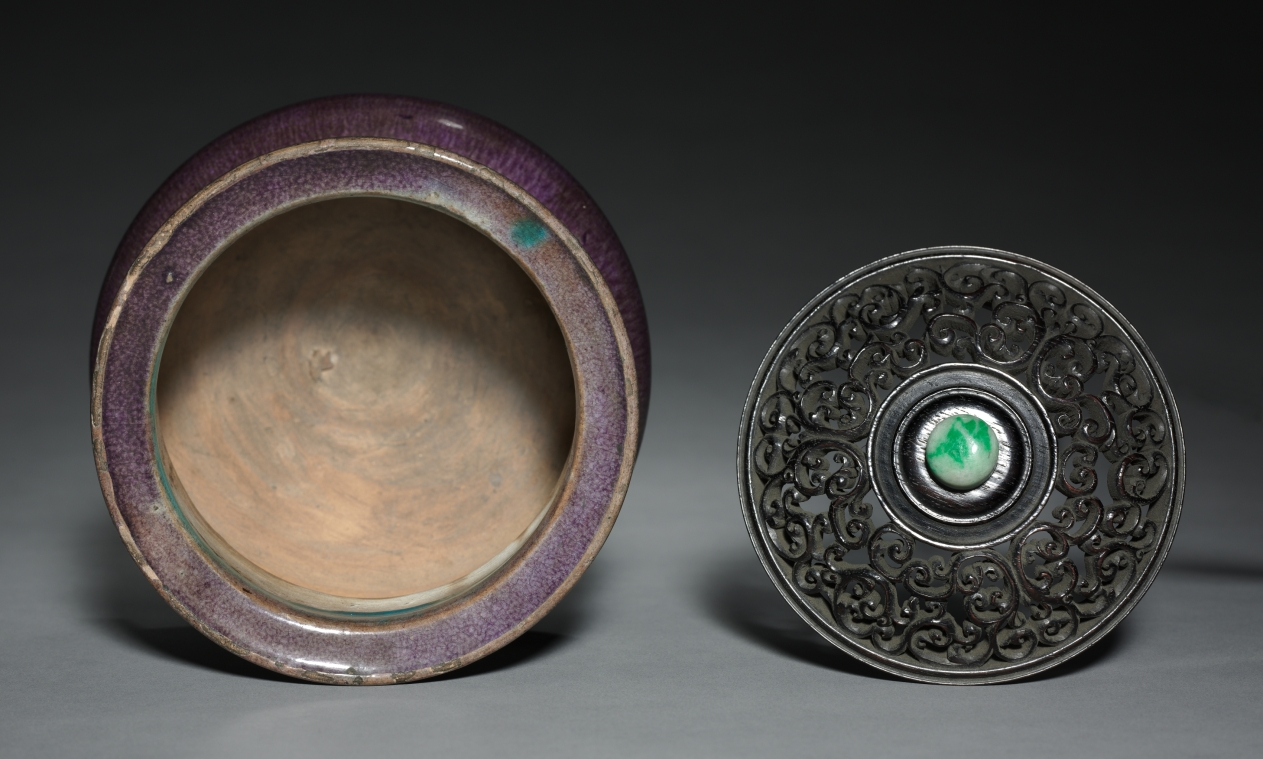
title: Tripod: Ding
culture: China, Ming dynasty (1368–1644)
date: 1368–1644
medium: porcelain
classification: Ceramic